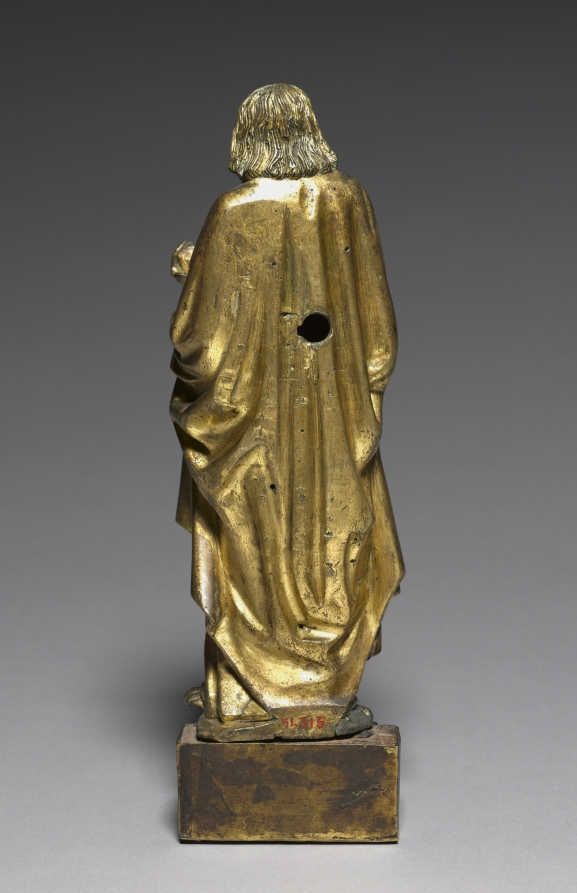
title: Saint John the Evangelist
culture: South Netherlands, probably Malines, 15th century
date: 1450–1475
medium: gilt bronze or brass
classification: Sculpture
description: The saint holds the legendary chalice, a poisoned cup, from which emerges a dragon, representing the serpent (Satan), recalling the incident in which John was forced to drink poison to test the power of his faith. John survived the test unharmed. It has been suggested that this statuette derives from a large multitiered baptismal font with niche figures in the Church of Notre-Dame in the town of Hal.